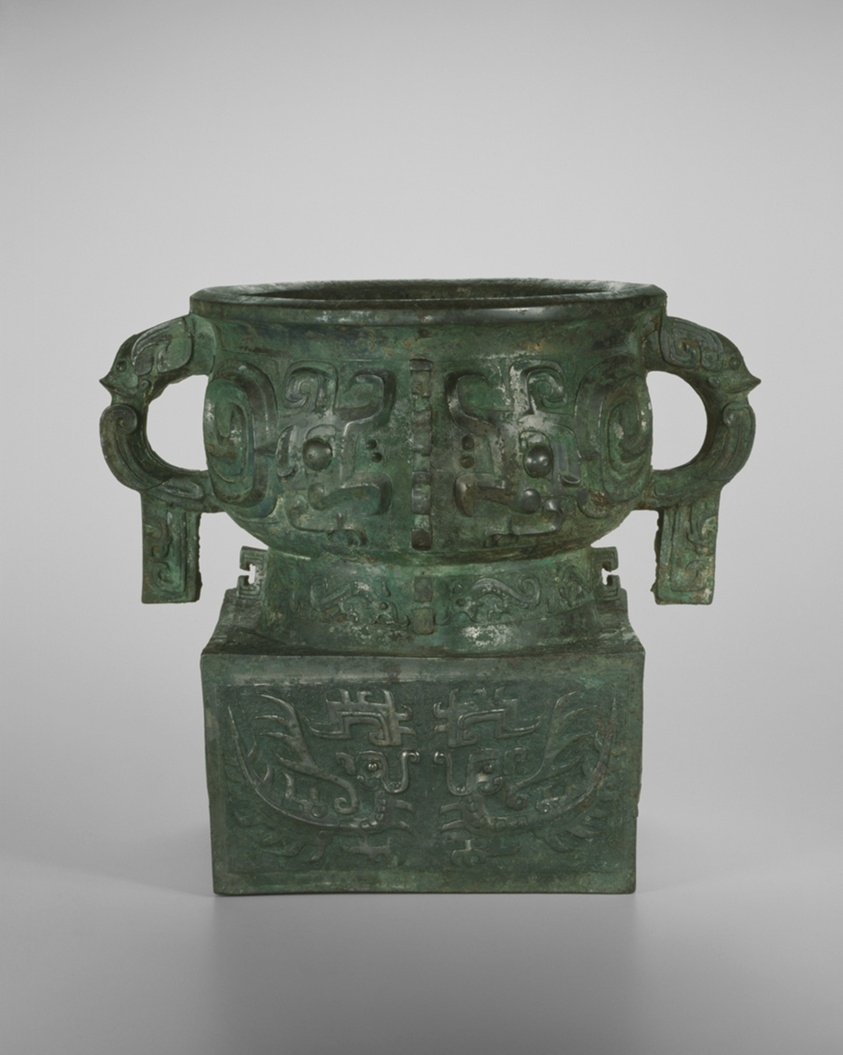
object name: Vessel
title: Food container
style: Chinese (culture or style)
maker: China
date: Western Zhou dynasty ( 1046–771 BC ), 2nd half of 11th century BC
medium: Bronze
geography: China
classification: vessel; bronze; metal; asian art